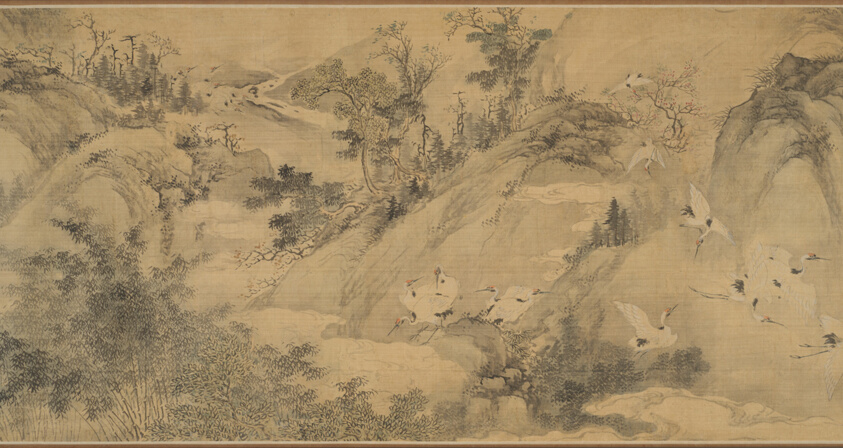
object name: Painting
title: One Hundred Cranes 百鶴圖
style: Chinese (culture or style)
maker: Artist unknown, spurious signature of Shen Quan 沈銓; Chinese, fl. 1725-1780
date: Qing dynasty (1644–1912) 清朝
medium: Handscroll; ink and light color on silk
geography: China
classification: handscroll; painting; asian art